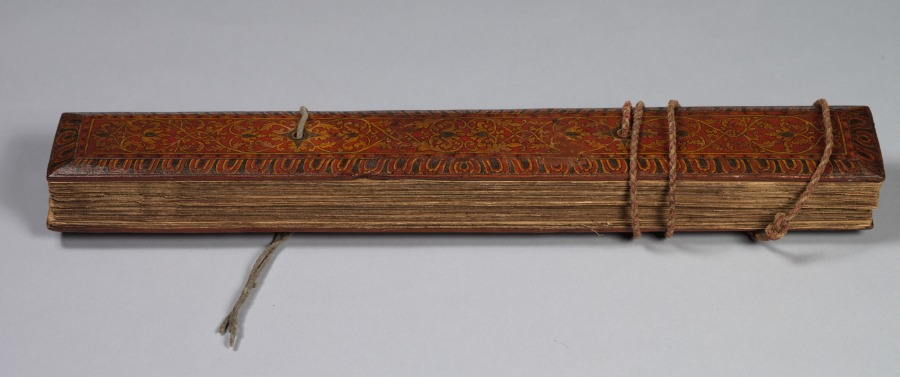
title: Buddhist Manuscript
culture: Sri Lanka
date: c. 1700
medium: Covers: Gum tempera on wood; pages: charcoal on palm leaves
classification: Manuscript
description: Palm leaf material is still used for manuscripts in Sri Lanka. The palm leaves are prepared first by boiling them, drying them in the sun, and then rubbing them with oils. Scribes then use a metal stylus to incise the text. Then charcoal powder is wiped across the pages, filling in only the inscribed lines.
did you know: The text is written in Sinhalese script.